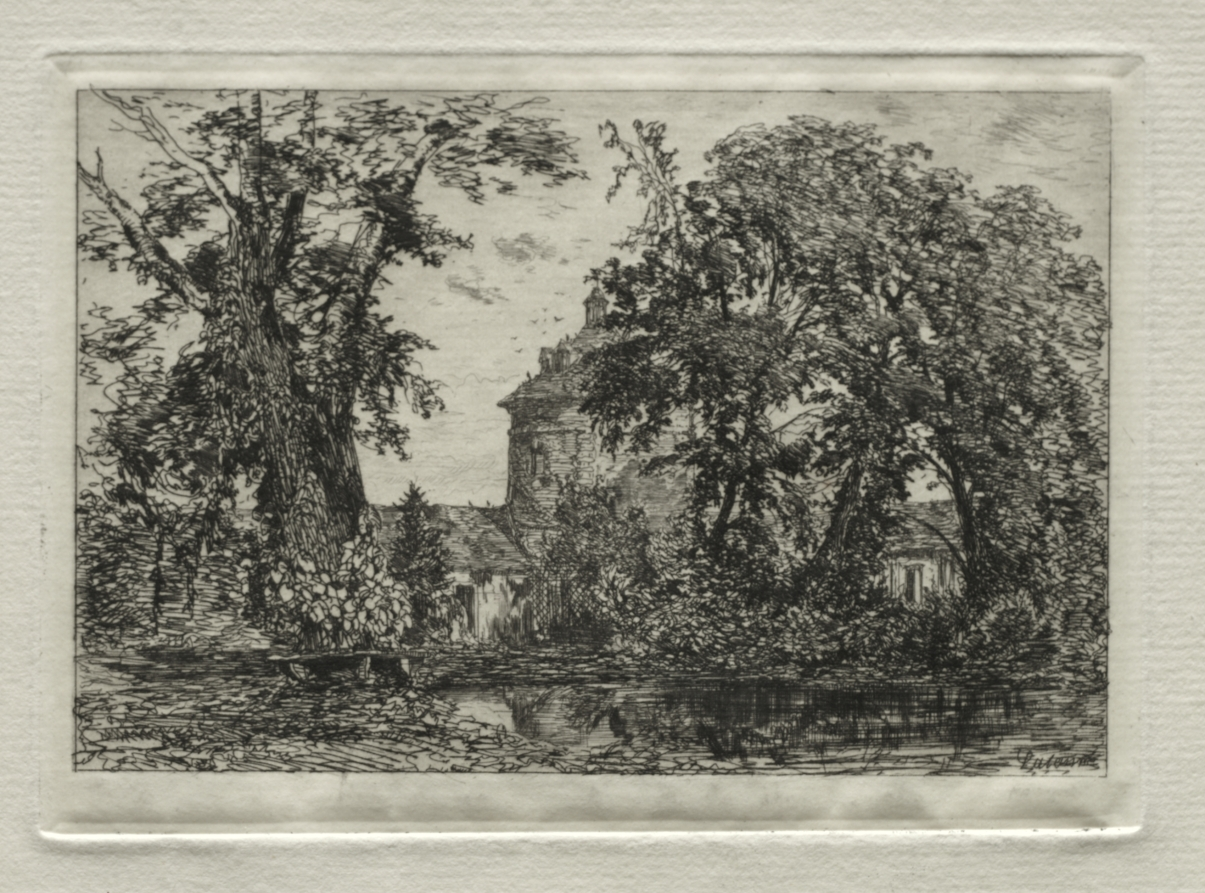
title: The Garret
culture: France, 19th century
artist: Maxime Lalanne (French, 1827–1886)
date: 1869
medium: etching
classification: Print